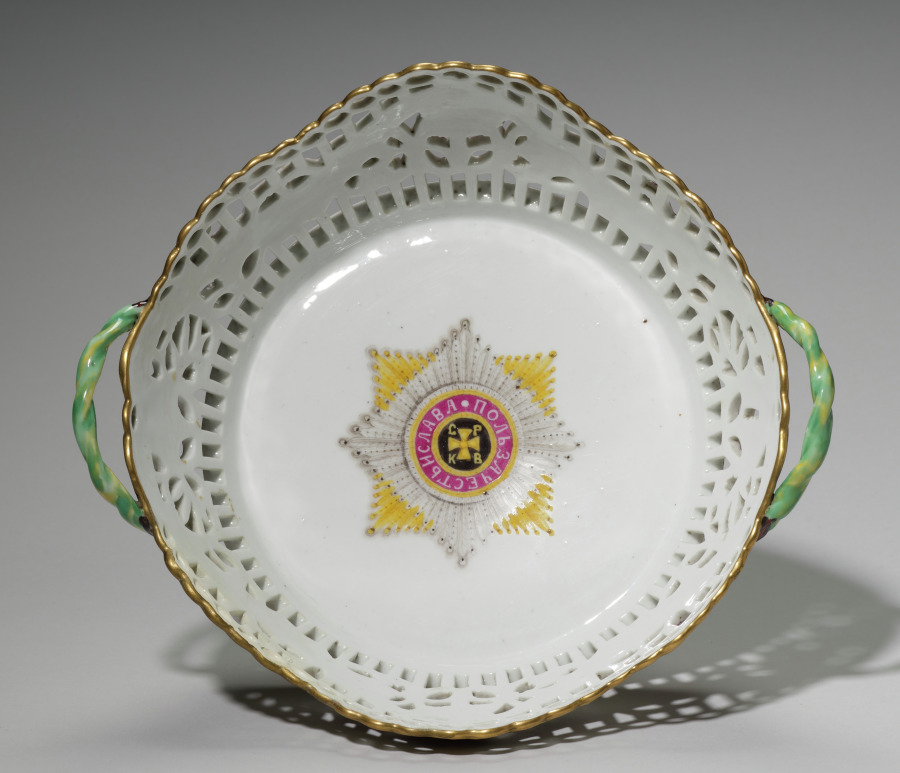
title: Fruit Basket (Corbeille)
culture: Russia, Moscow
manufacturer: Gardner Factory (Russian)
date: c. 1783–85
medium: porcelain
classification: Ceramic